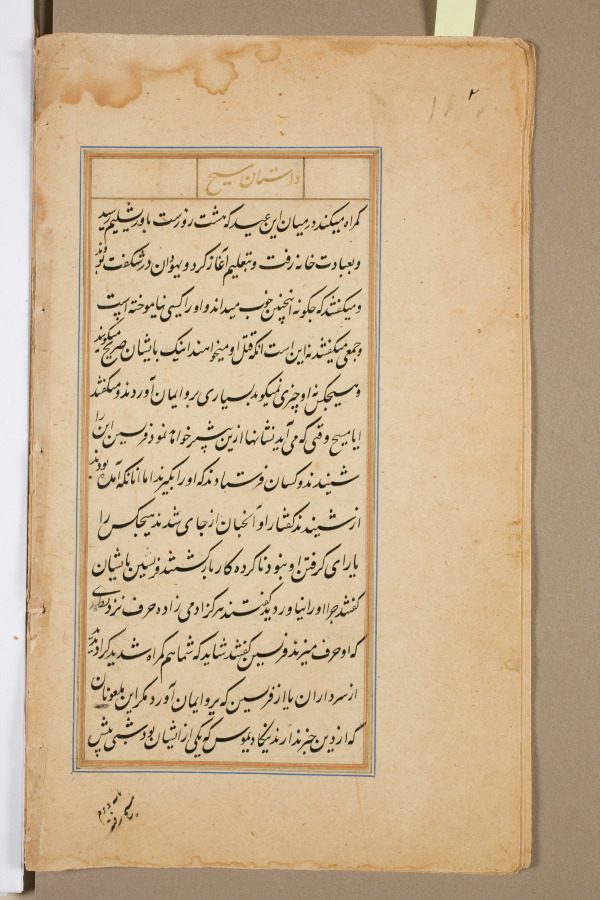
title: Text page from a Mirror of Holiness (Mir’at al-quds) of Father Jerome Xavier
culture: Mughal India, Allahabad, made for Prince Salim (1569–1627)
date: 1602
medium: Ink and gold on paper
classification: Manuscript